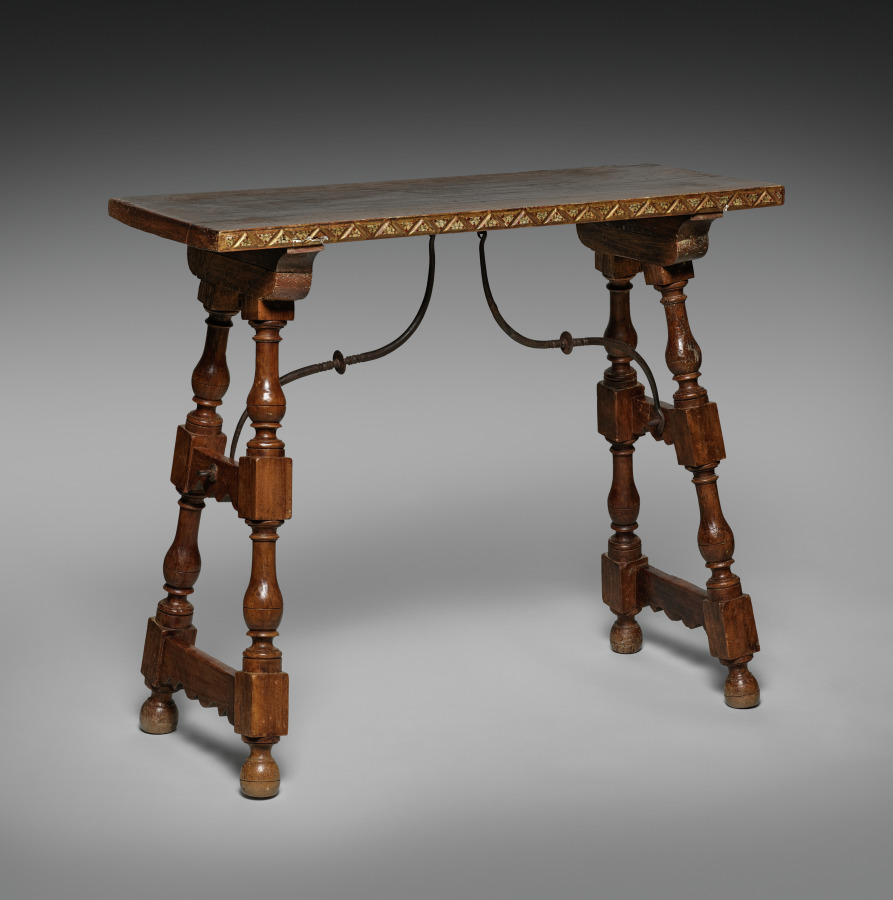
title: Chest (Base)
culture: Spain, Colonial, late 17th Century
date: late 1600s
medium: turned and joined wood with wrought iron hardware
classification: Furniture and woodwork